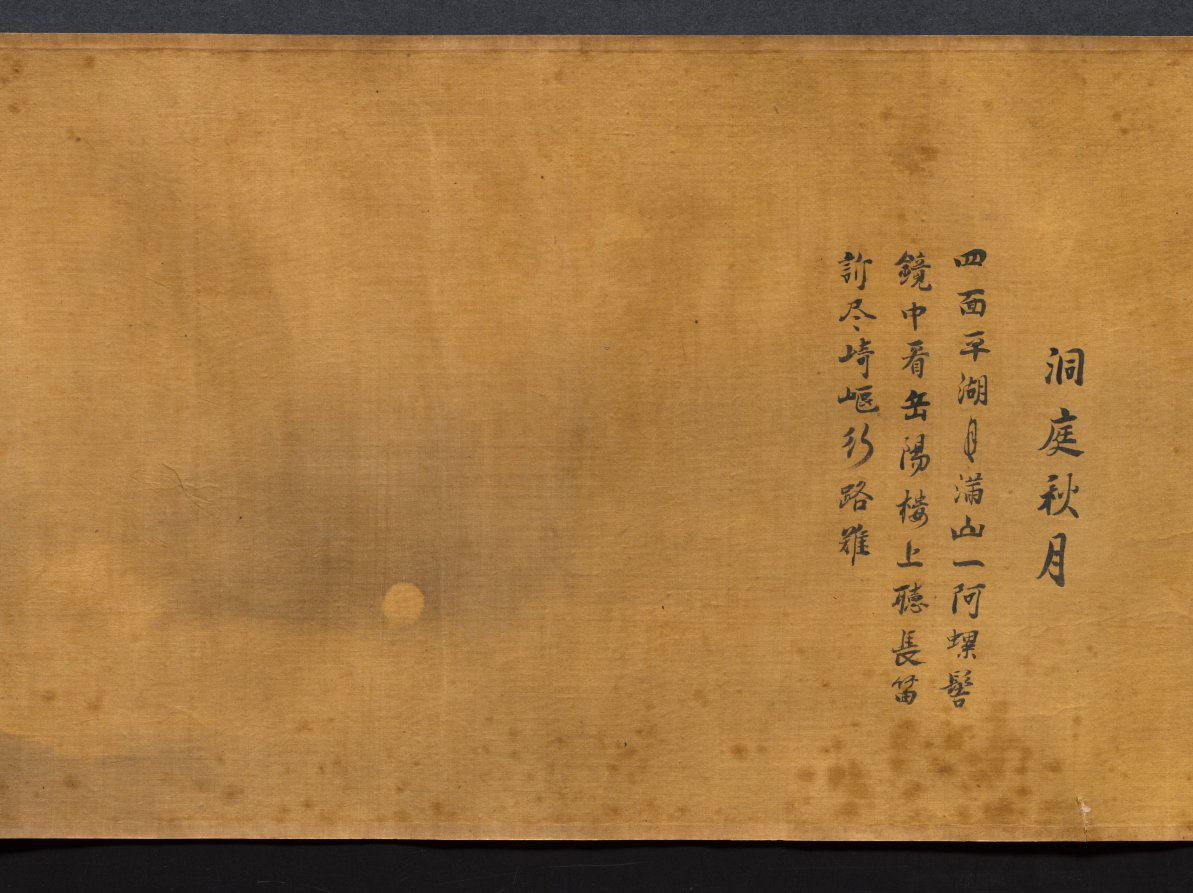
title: Eight Views of Xiao-Xiang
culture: Japan, Edo period (1615–1868)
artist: Kano Tan’yū (Japanese, 1602–1674)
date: 1615–1868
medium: handscroll; ink on silk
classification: Painting